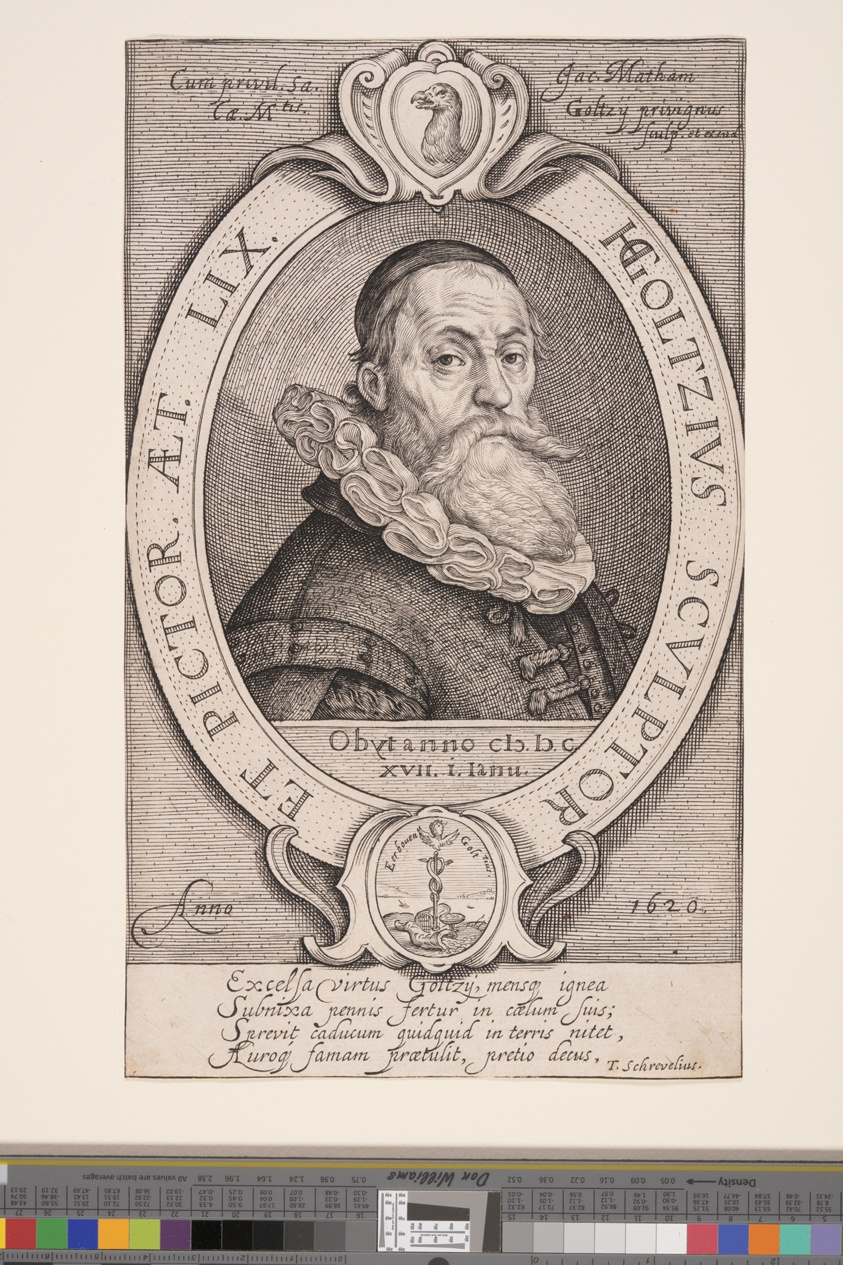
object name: Print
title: Hendrick Goltzius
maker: Jacob Matham (Dutch, 1571–1631)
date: 1618, altered in 1620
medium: Engraving on laid paper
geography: Netherlands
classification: print; engraving; paper; prints and drawing